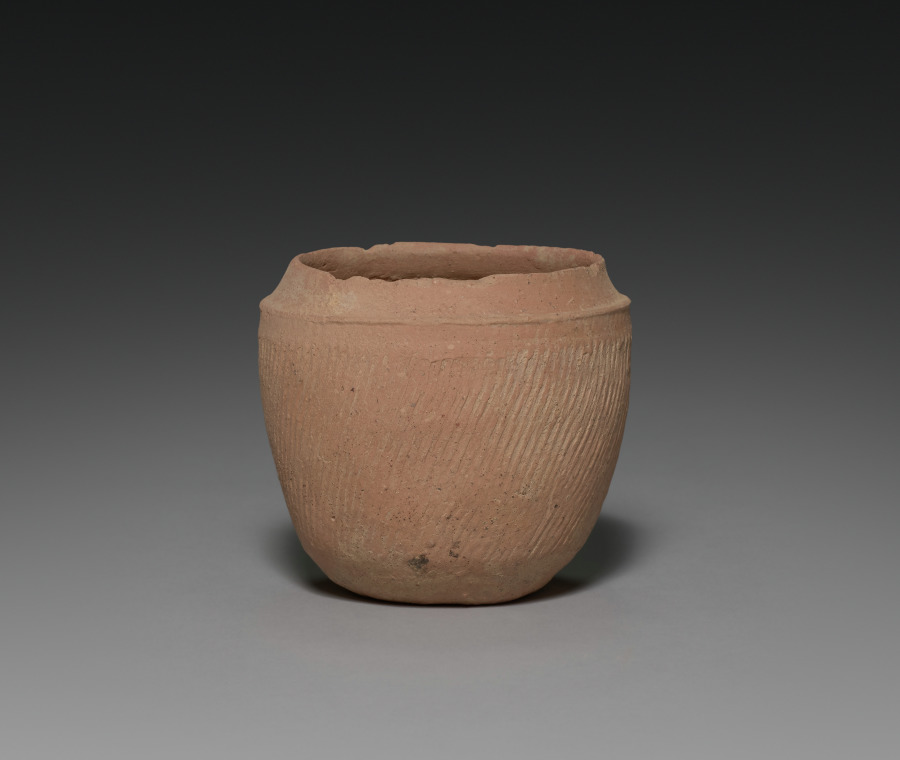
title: Covered Jar with Horn Handle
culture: Korea, Silla (57 BC-935) or Kaya (AD 42-562) period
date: 400s–500s CE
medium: red earthenware with impressed designs and applied red slip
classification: Ceramic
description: Early earthenware from the Three Kingdoms period (57 BCE–668 CE) became widely utilized as agriculture and religion grew to be essential elements in sustaining society and its systems. The clay jars of different sizes and shapes on display were made for the following purposes: some were used to store harvested grains and seeds, some, especially lidded ones such as this example, to preserve cremated remains, and some to serve offerings in rituals.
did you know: Closed kilns built on hillsides became widely used for producing this type of pottery vessel in Korea during the Three Kingdoms period.